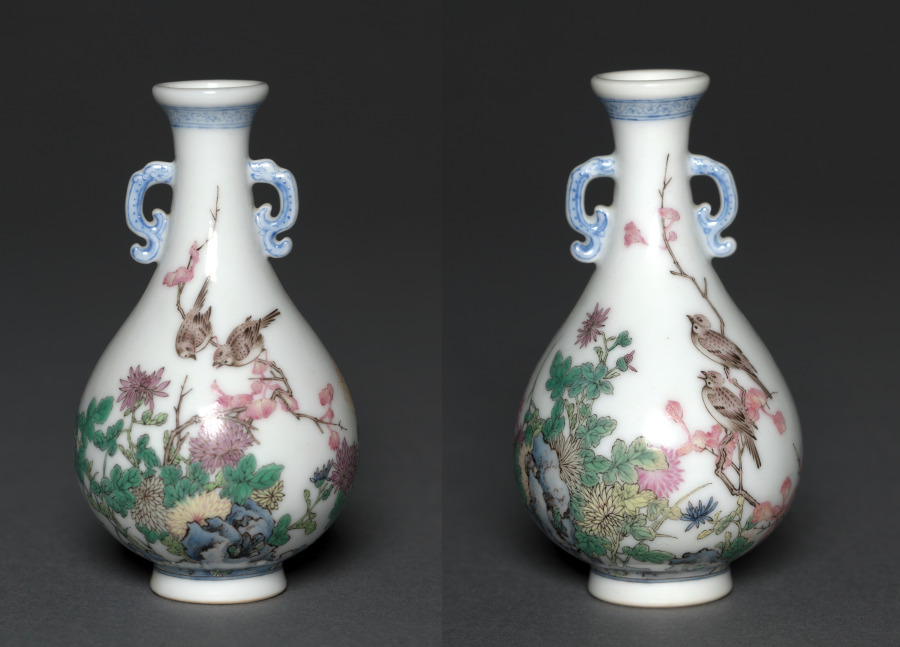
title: Pair of Miniature Vases with Birds and Chrysanthemums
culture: China, Jiangxi province, Jingdezhen kilns, Qing dynasty (1644-1911), Qianlong mark and reign (1736-95)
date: 1736–95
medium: porcelain with famille rose overglaze enamel decoration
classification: Ceramic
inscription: 乾隆年製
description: In the Qing dynasty (1644–1911), imperial patronage and a growing urban population encouraged consumption of luxury goods and local craftmanship. Luxury items became more affordable to larger parts of the society, including women, merchants, and literati in non-official positions. This pair of miniature porcelain vases with famille rose overglaze enamel decoration illustrates some of the highest technical accomplishments in Qing porcelain production.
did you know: The chrysanthemum is considered one of the "Four Noble Gentlemen" along with plum, orchid, and bamboo.